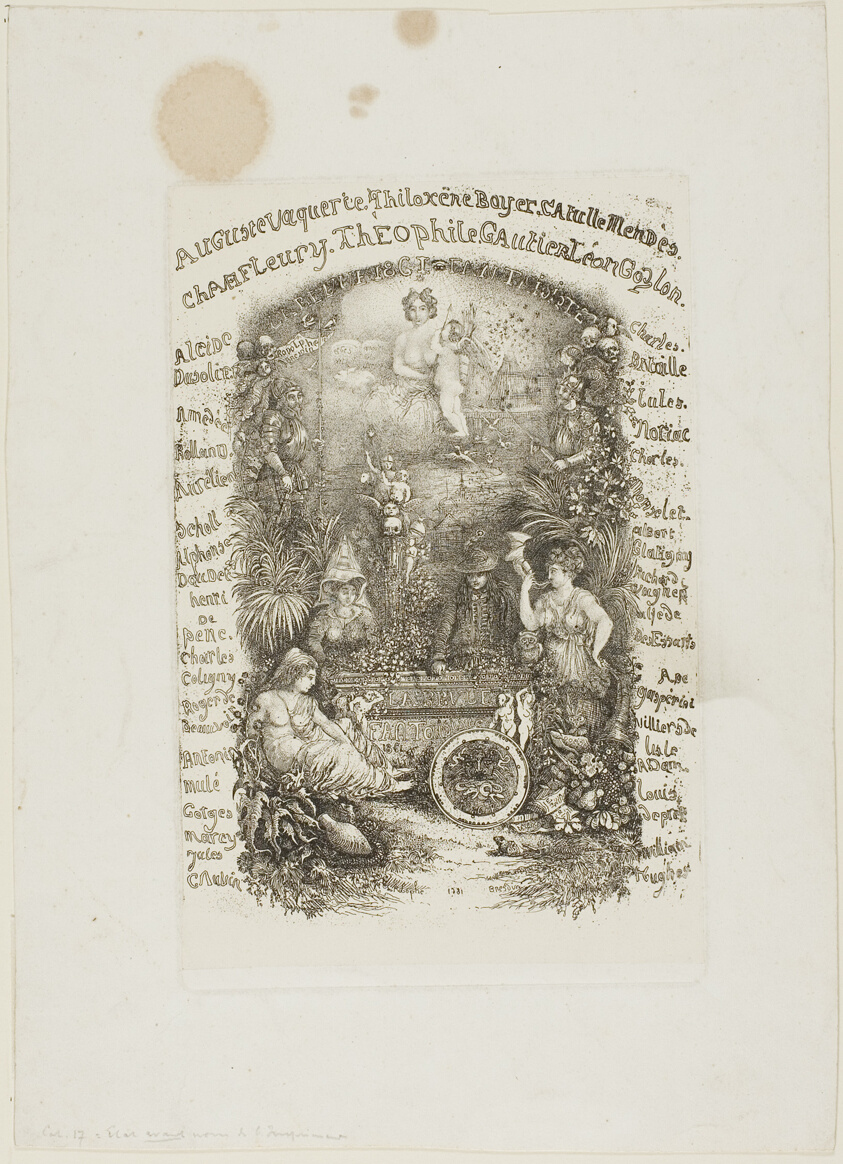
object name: Print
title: Frontispiece for the Revue Fantaisiste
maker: Rodolphe Bresdin (French, 1825-1885)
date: 1861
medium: Etching on ivory China paper laid down on white wove paper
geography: France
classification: etching; print; prints and drawing